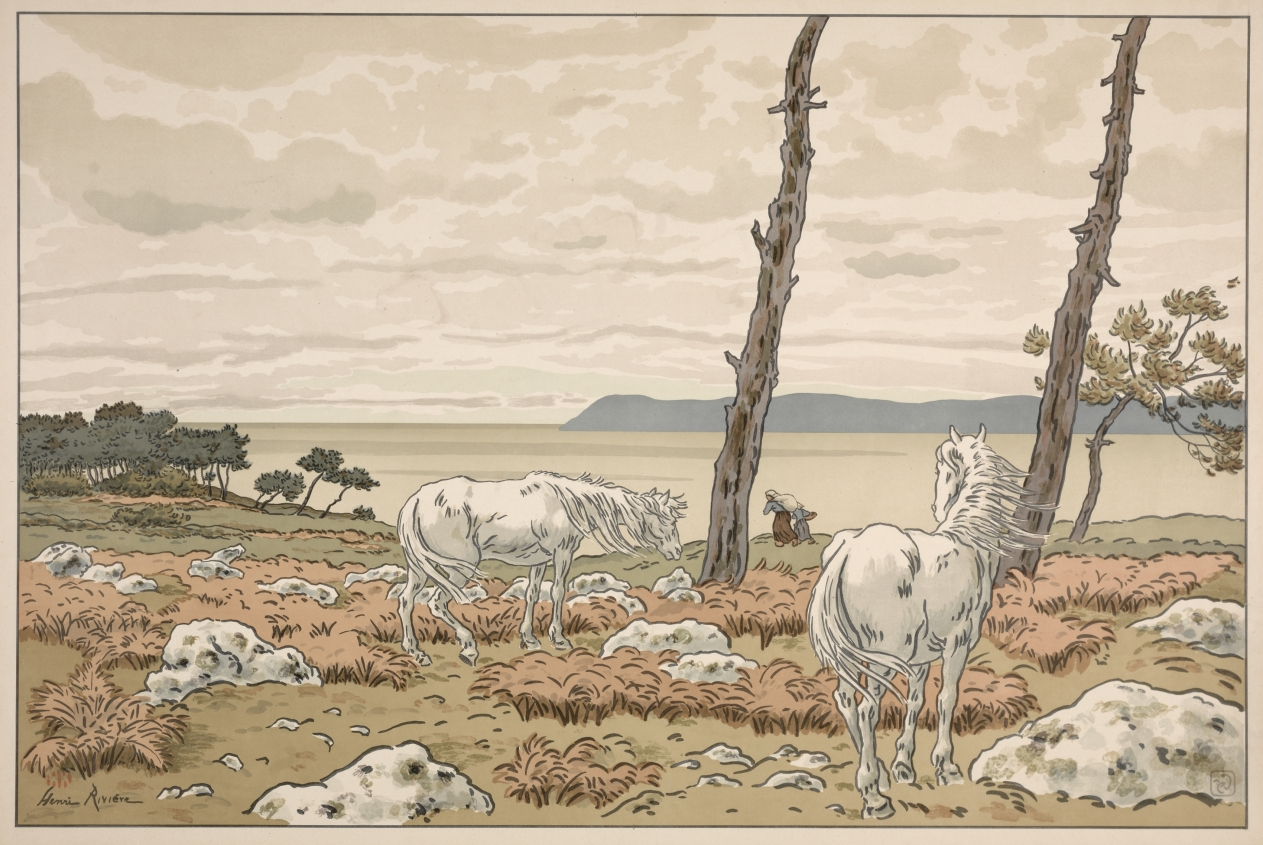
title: Aspects of Nature: The Bay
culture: France, 19th century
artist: Henri Rivière (French, 1864–1951)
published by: Printed by Verneau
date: 1897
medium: color lithograph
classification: Print